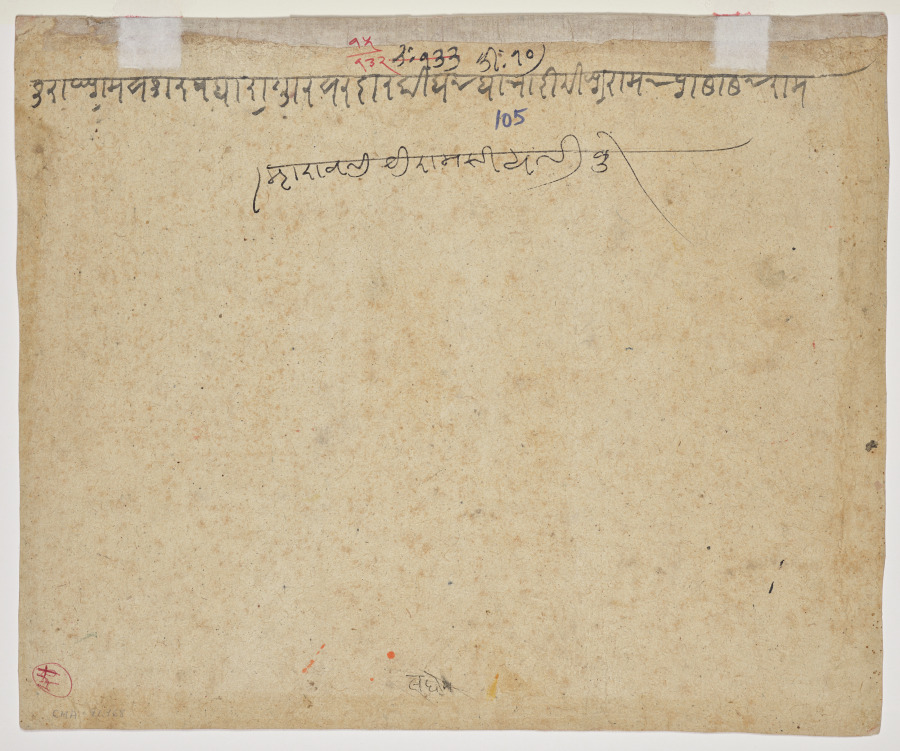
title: Tiger Hunt of Ram Singh II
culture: Northwestern India, Rajasthan, Rajput kingdom of Kota, court of Ram Singh II (reigned 1826–66)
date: c. 1830–40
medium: Gum tempera, ink, and gold on paper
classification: Painting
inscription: [[recto, upper margin, in white Devanagari script]] Śrī māhārāo rām sīnghjī sīkār ke rāyā kī bīḍā kī cāc kī Cāmlaṇī nāva kīya savāri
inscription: [[verso, in blue ink]] 105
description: Set against the dramatic backdrop of the cliffs that define the landscape of the small princely kingdom of Kota, a majestic tiger has just been shot by the king. Noisemakers with a firebrand drive the tiger out of the forest, and men at the right keep bears at bay. The women and musicians in two small boats look on in admiration.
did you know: The drummers and horn blowers proclaim to the population that the king shot a tiger.